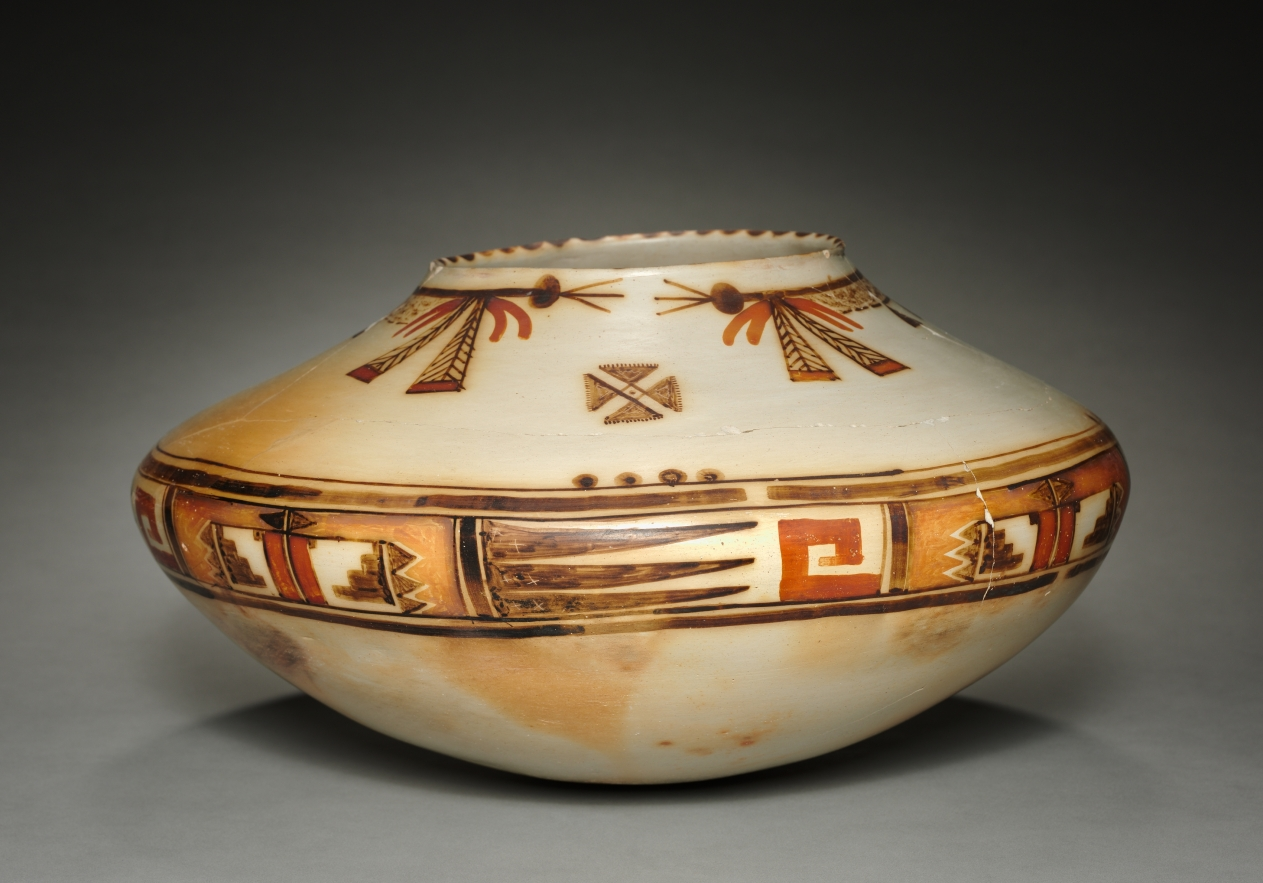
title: Jar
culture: Native North America, Southwest, Ancestral Pueblo, Sikyatki style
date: 1400–1600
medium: Ceramic, slip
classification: Ceramic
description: Ancient Sikyatki ceramics are noted for their large, distinctive shapes, meticulously stone-polished surfaces, thin walls that “ring” when tapped, and wide variety of reds and oranges, a contrast to earlier preferences for black and white. These artistically and technically inventive vessels are ancestral to modern Hopi ceramics, having developed in the area where Hopi communities live today. The Hopi regard a mottled orange color as a sign that the pot emerged from firing with life and spirit; the vessel’s “voice” is a bell-like tone that tapping produces. Such concepts likely have roots in the ancient past.